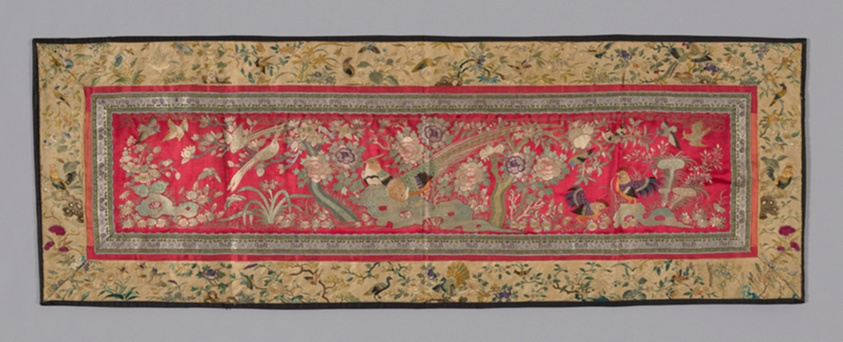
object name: Textile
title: Panel (Furnishing Fabric)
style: qing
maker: China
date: Qing dynasty (1644–1911), 1875/1900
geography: China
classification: textile; needlework (visual works); weaving; furnishing textile